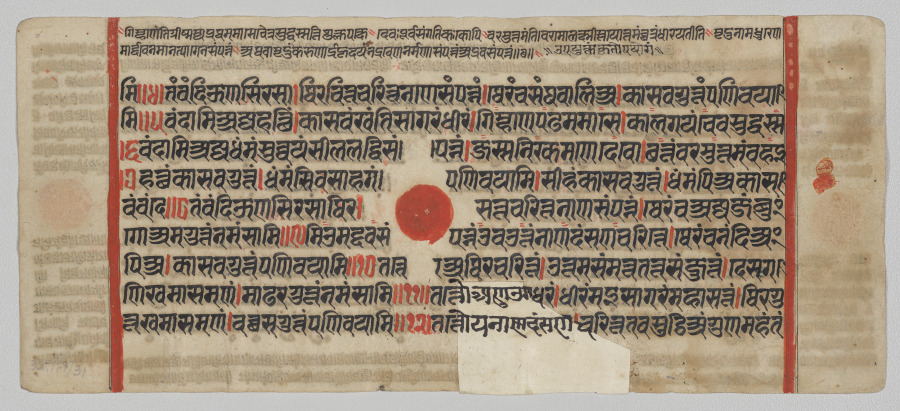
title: Text, Folio 66 (recto), from a Kalpa-sutra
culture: Western India, Gujarat, last quarter of the 15th century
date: c. 1475–1500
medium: Gum tempera, ink, and gold on paper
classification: Painting